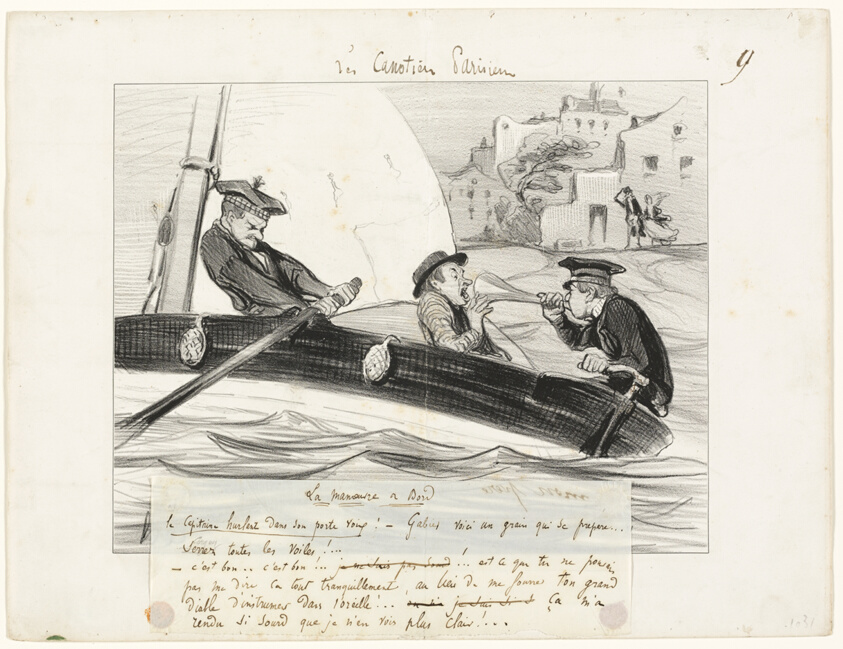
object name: Print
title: A Boat Maneuver, plate nine from Les Canotiers Parisiens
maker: Honoré-Victorin Daumier (French, 1808-1879)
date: 1843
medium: Lithograph in black, with additions in pen and brown ink (faded to gray) and caption in pen and brown ink, on ivory wove paper, tipped onto ivory wove paper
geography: France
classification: lithograph; print; prints and drawing